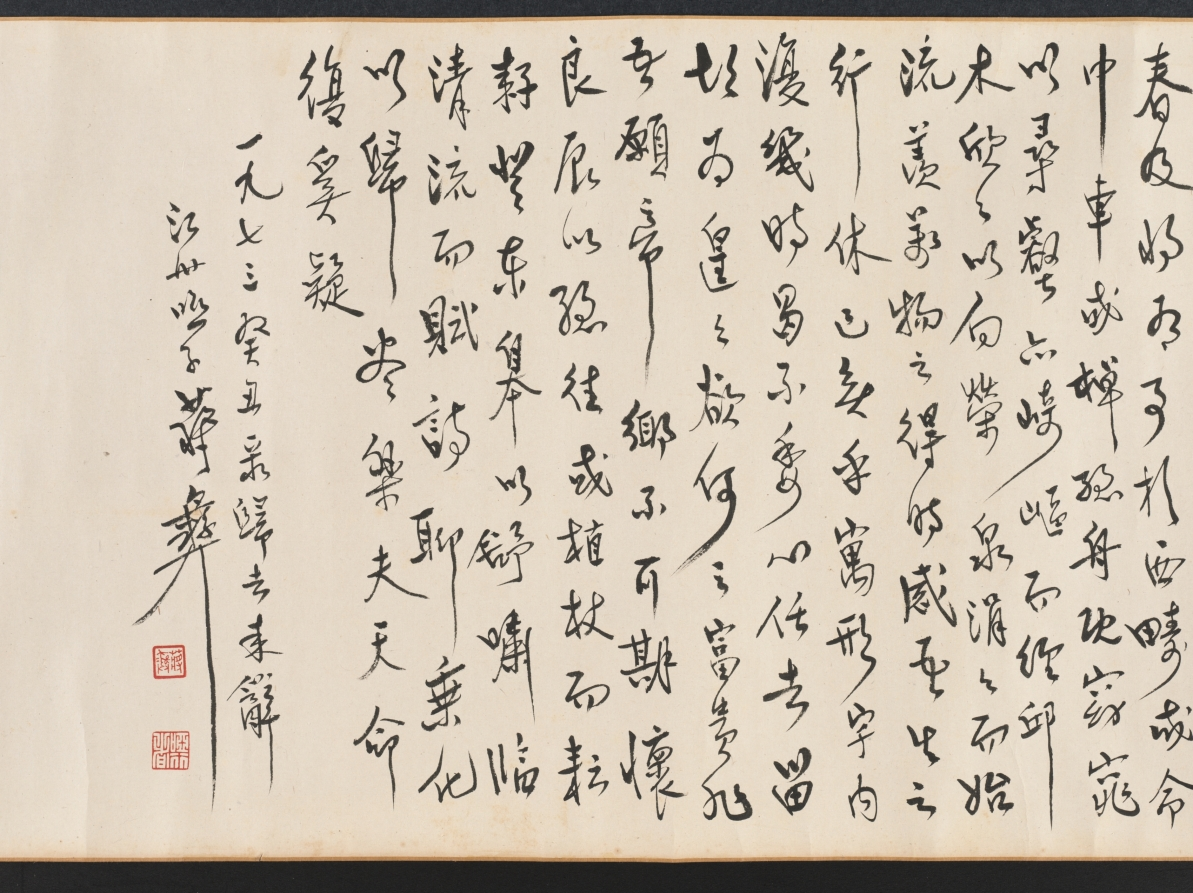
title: Tao Yuanming's Return Home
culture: China, Yuan dynasty (1271-1368)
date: 1300s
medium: Handscroll; ink and slight color on silk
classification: Painting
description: Tao Yuanming's revered poem "Return Home 歸去來辭 (Gui qu lai ci)" powerfully conveys his desire to leave bureaucratic life for the simplicity and authenticity of nature. This sentiment has deeply resonated with generations of Chinese scholars, making it a popular theme in paintings. This handscroll uses continuous narrative depicting Tao in multiple scenes from the poem. Starting on the right, the poet travels to his home. His children wait by the gate, while his wife pauses to tidy her hair before welcoming him. Then, free from the burdens of official service, Tao spends time in both nature and his cottage, where he can again enjoy wine, music, and books.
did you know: Poet Tao Yuanming 陶淵明 (c. 365–427 CE) returned to a secluded life instead of pursuing a civil service career.